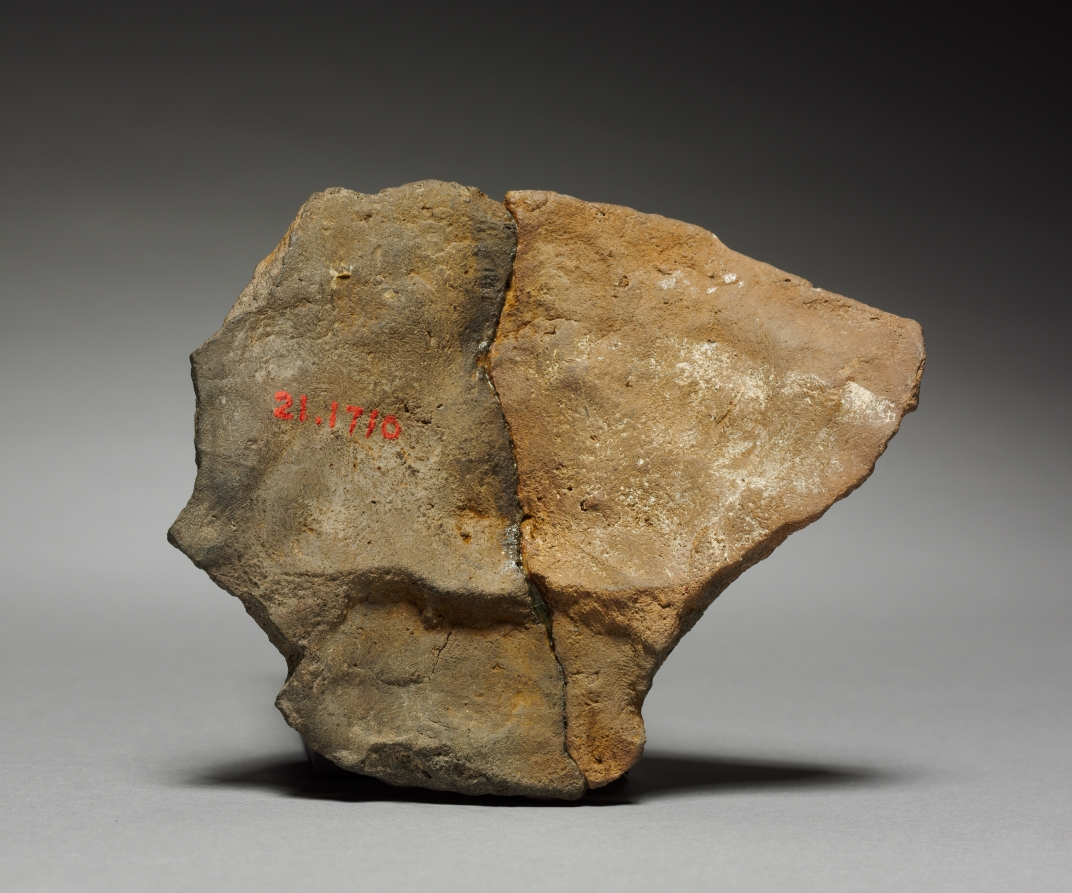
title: Head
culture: Mexico, Teotihuacan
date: 1–750 CE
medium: pottery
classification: Ceramic